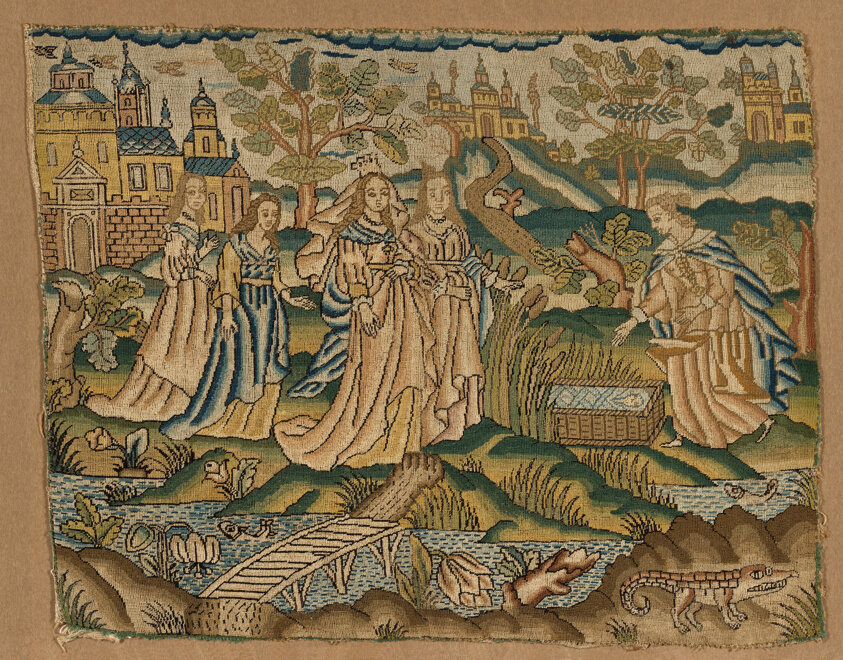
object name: Textile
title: Picture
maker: England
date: 17th century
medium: Linen, plain weave; embroidered with silk in tent stitches; edged with wool, plain weave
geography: England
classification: textile; needlework (visual works)